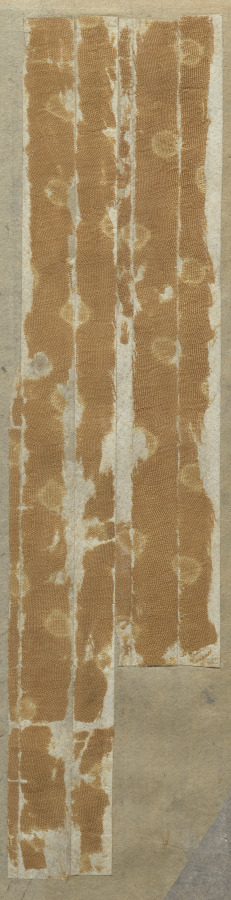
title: Fragment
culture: China or Japan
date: 700s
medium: plain cloth, batik printed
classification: Textile